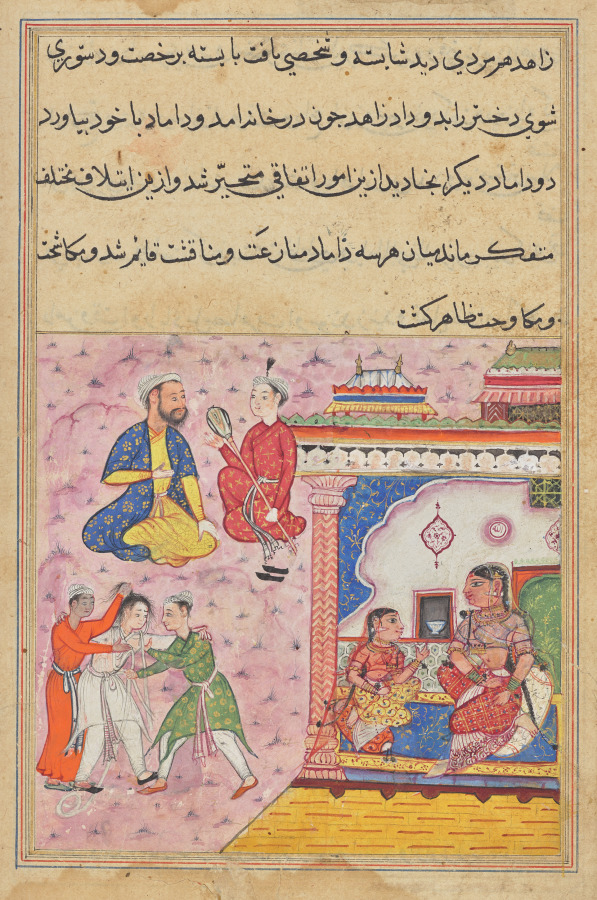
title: Three suitors fight amongst themselves for the hand of the devotee’s daughter, from a Tuti-nama (Tales of a Parrot): Twentieth Night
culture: Mughal India, court of Akbar (reigned 1556–1605)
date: c. 1560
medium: gum tempera, ink, and gold on paper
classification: Painting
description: In the foreground, three men brawl. Each was promised the hand of a religious man’s daughter, and each believed himself to be the worthiest suitor. The daughter, sitting in the chamber with her mother, is so upset by the conflict that she falls ill and appears to die. Her father, the devotee, sits in the background alongside his son.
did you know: Allah’s name is painted in a roundel on the wall, signaling the Muslim family’s devotion.